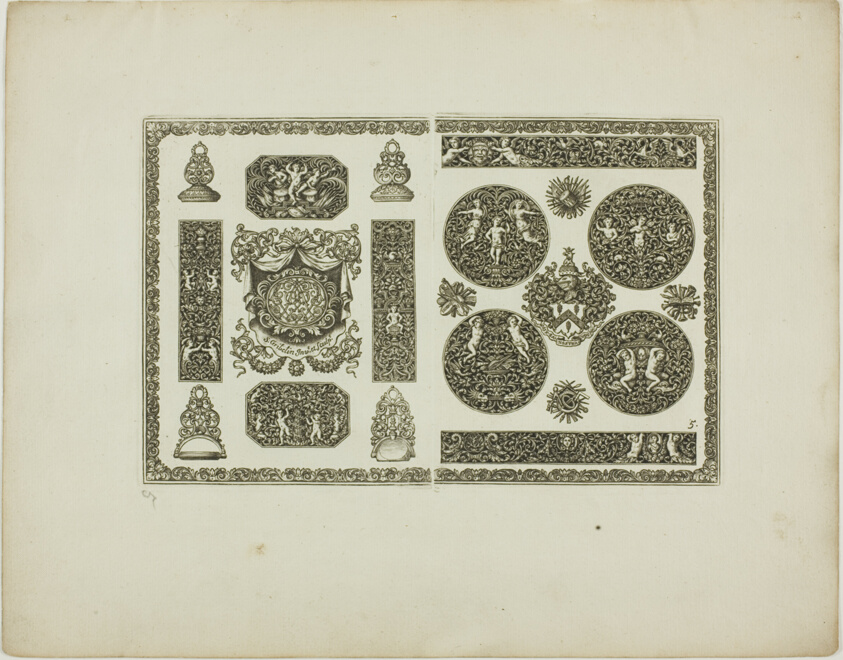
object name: Print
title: Plate Five, from Book of Ornament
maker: Simon Gribelin II; French, 1661-1733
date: 1704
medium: Engraving on paper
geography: France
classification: engraving; print; prints and drawing